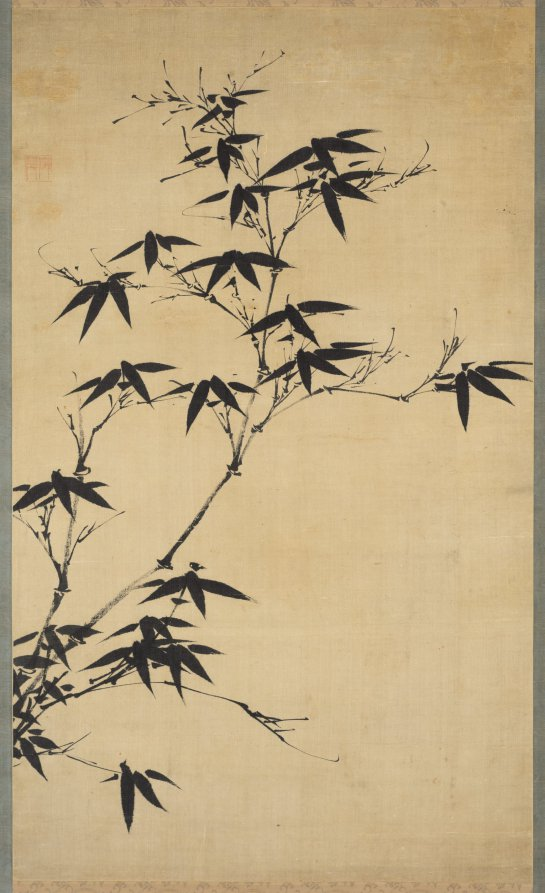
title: Bamboo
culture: Korea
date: 1900s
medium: hanging scroll; ink on silk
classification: Painting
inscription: With spurious seal of Yi Chong (1541-1622)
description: As one of the four symbols called "Four Gentlemen ( 四君子),” along plum blossoms, chrysanthemum, and orchids, bamboos represent strength, both physical and mental.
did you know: This work is modern imitation of the famous 17th-century literati painter Yi Jeong known for his bamboo painting in ink. Yi's original work is the collection of the Metropolitan Museum of Art (https://www.metmuseum.org/art/collection/search/50486).